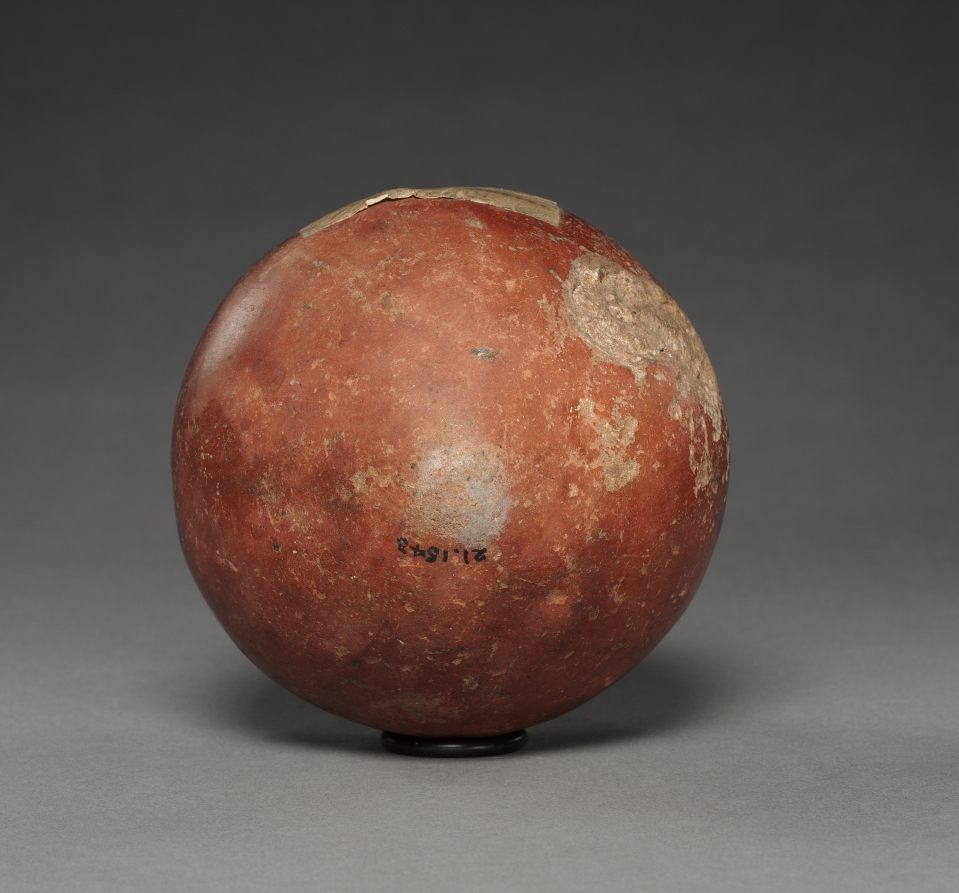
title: Dish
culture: Colombia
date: before 1550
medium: pottery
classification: Ceramic